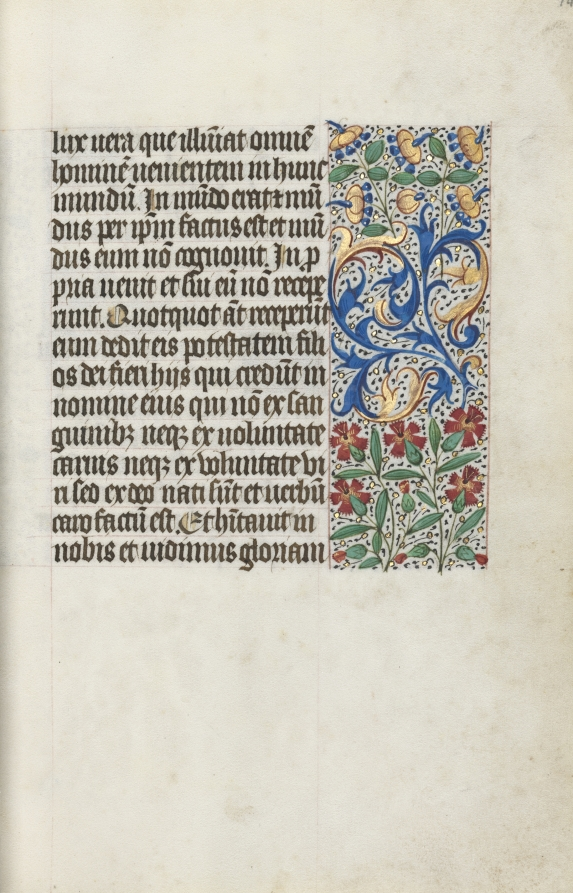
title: Book of Hours (Use of Rouen): fol. 14r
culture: France, Rouen, 15th century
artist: Master of the Geneva Latini (French, active Rouen, 1460–80)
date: c. 1470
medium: ink, tempera, and gold on vellum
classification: Bound Volume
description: In the late 1400s and early 1500s Rouen was an established and important center of book production. The city’s cathedral had a wealthy chapter that spent large sums of money to commission books and to maintain its extensive library. The stationers and booksellers would have likely been concentrated in or near the cathedral precinct. This artist, named after a manuscript now in Geneva, was Rouen’s principal illuminator during the second half of the 1400s.